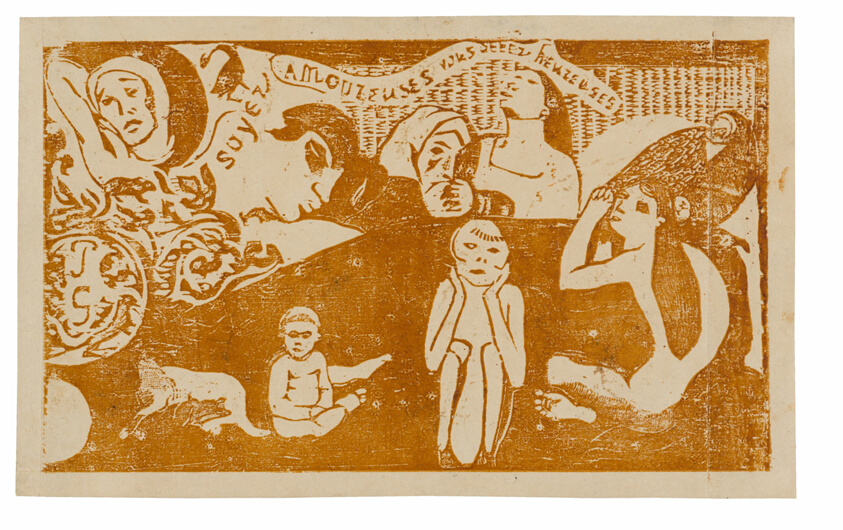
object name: Print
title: Soyez amoureuses, vous serez heureuses (Love, and You Will Be Happy), from the Suite of Late Wood-Block Prints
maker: Paul Gauguin (French, 1848-1903)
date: 1899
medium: Wood-block print in dark-orange (burnt sienna) ink on cream wove paper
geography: France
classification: woodcut; print; prints and drawing